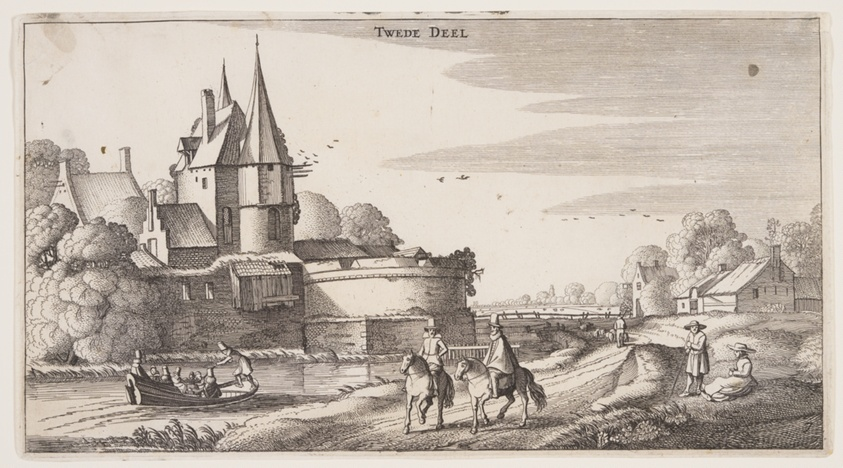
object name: Print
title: Country Road Along a Village with a Bastion, from Landscapes (Playsante Lantschappen)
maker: Attributed to Claes Jansz. Visscher II (Dutch, 1586-1652); after Jan van de Velde II (Dutch, c. 1593-1641)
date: c. 1641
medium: Etching, with engraving, on ivory laid paper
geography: Netherlands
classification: etching; paper; print; prints and drawing